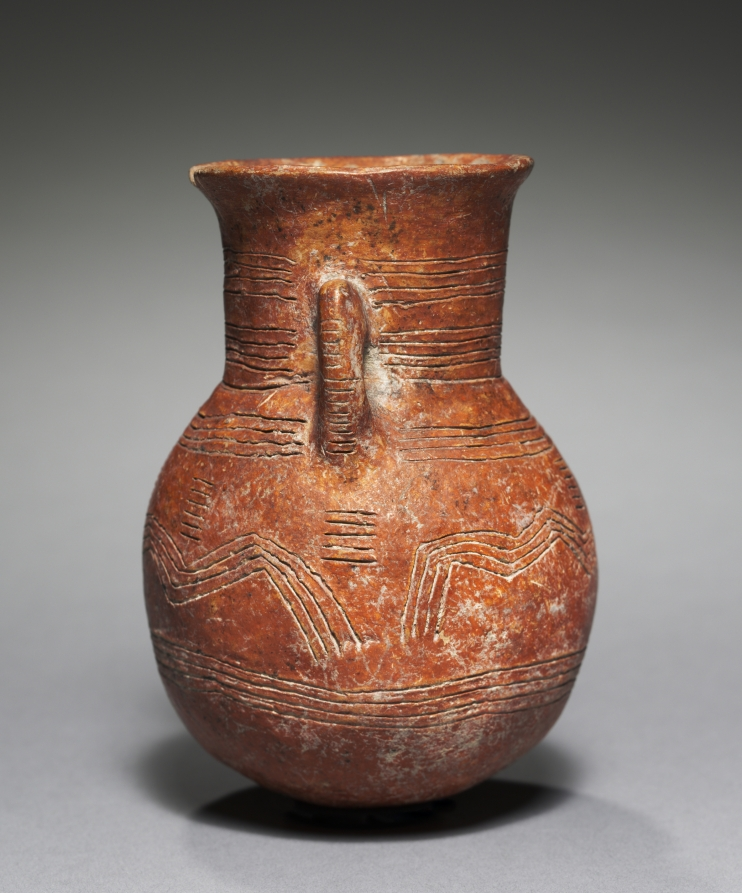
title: Amphora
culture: Cyprus, early Cypriot III–middle Cypriot I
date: c. 2000–1800 BCE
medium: red ware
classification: Ceramic